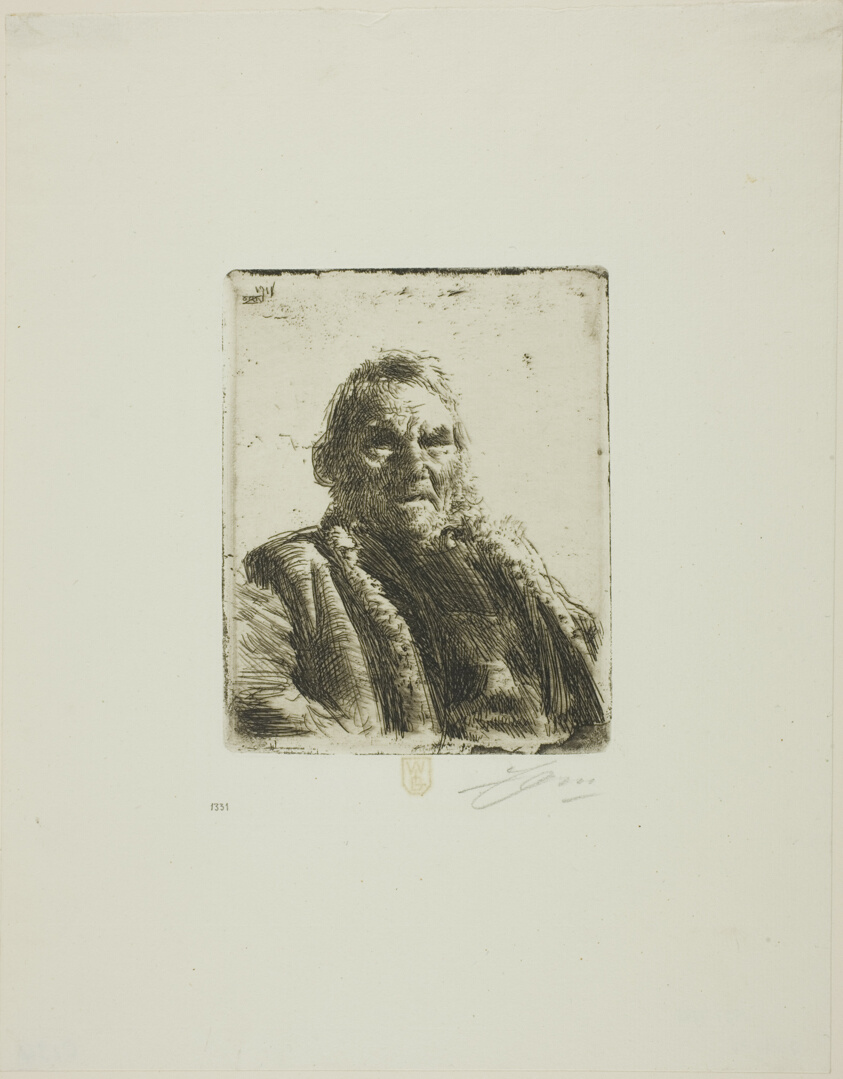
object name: Print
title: Old Soldier ("Prinsen")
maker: Anders Zorn (Swedish, 1860-1920)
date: 1911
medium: Etching on ivory laid paper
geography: Sweden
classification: etching; print; prints and drawing